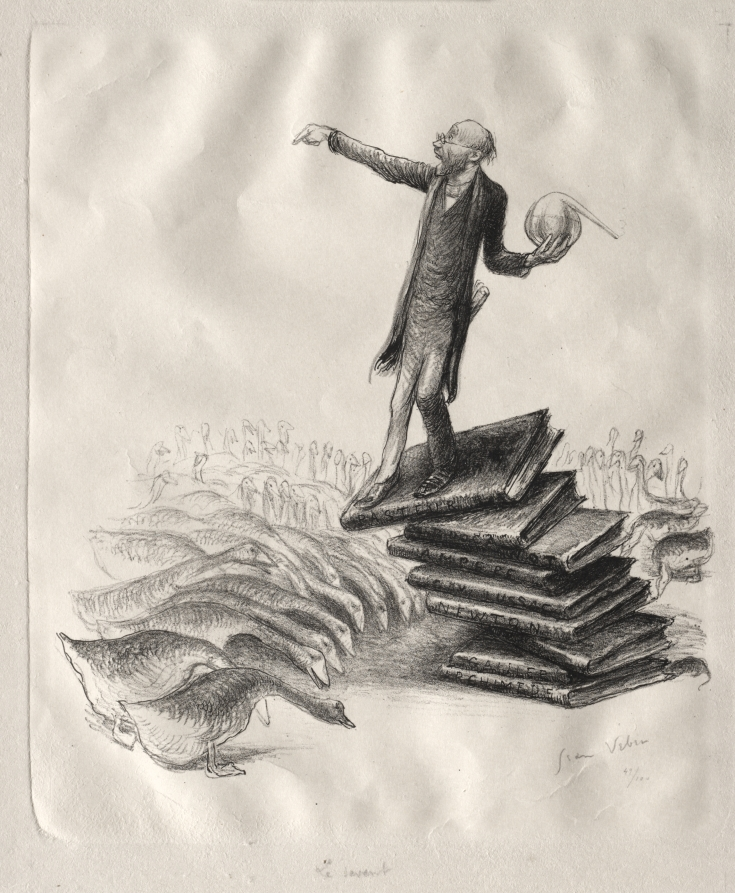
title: The Savant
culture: France, 19th century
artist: Jean Veber (French, 1864–1928)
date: c. 1885–1928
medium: lithograph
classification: Print